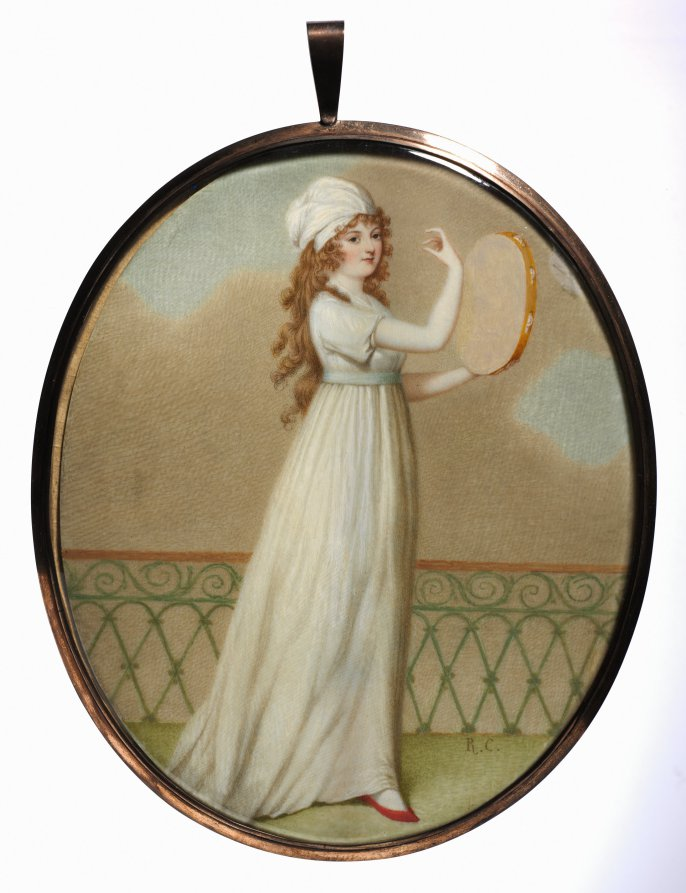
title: Woman with a Tambourine, in Neoclassical Costume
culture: England, 19th century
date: mid to late 19th century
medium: watercolor on ivory in a gold frame with blue glazed reverse and reserve with plaited hair and initials in gold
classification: Portrait Miniature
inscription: annotated lower right: R.C. [initialed on back: JCSB]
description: This large miniature depicts a woman at full length, turned to the left, playing a tambourine held in her left hand. She wears a floor-length, white, Empire-waist gown with short sleeves and scarlet slippers. The Empire silhouette was fashionable in the years around 1800, when it was executed in fine, white cotton or muslin and meant to recall classical Greek or Roman dress. The woman’s light brown hair falls below her waist in curls, and she wears a white turban. She stands on a pale green, closely cropped lawn in front of a low, green, wrought-iron fence with a wood railing. At over 15 centimeters high in its frame, this miniature’s size is incongruous with its oval shape and elaborate glass and braided hair setting, which were typical of late-eighteenth- and early-nineteenth century wearable miniatures a third or quarter of this size. The woman’s face lacks specificity and is probably not a portrait of a particular individual but, rather, a fancy picture exploring themes of beauty and music. This assertion does, however, call into question the presence of the initials and hair on the back of the setting, which customarily indicate an intimate relationship between the owner and the sitter that presumably would be absent outside of portraiture. When this work entered the collection in 1926, it was believed to date from the late eighteenth century, but its size, shape, and the full-length figure make such an early date extremely unlikely. The signature “R. C.” may suggest Richard Cosway (1742–1821), the highly sought-after eighteenth- and nineteenth-century miniaturist; however, this work does not resemble his style. J. H. Wade purchased this object in 1896 for $150—a substantial sum during that period for a miniature—indicating that he may have thought the work was indeed by Cosway. This miniature does relate closely in style and subject matter to the work of the British artist Adam Buck (1759–1833), who was known for his classicizing, full-length watercolor portraits and fancy pictures, after which this work may be a copy. Buck’s miniatures on ivory are bust length and more strongly delineated than this work, which instead recalls the artist’s watercolors. Hallmarks of Buck’s drawings include a low horizon line, muted palette, full-length female figures depicted in profile, and a patchy blue, cloudy sky. A scrolled, wrought-iron fence similar to the one present in this miniature appears in a drawing by Buck. In both cases the fence is used decoratively to break up the expanse of bare space created by the low horizon line and vacant sky. Buck’s works often feature women listening to or playing an instrument, including the tambourine, but he is not known to have painted these full-length figures on ivory. The numerous incompatibilities—including style, subject, composition, medium, setting, size, and signature—together suggest that this object was painted in the second half of the nineteenth century specifically for the art market and to evoke an earlier period.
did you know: On the back the initials JCSB in gold are placed over plaited hair of at least two different colors.